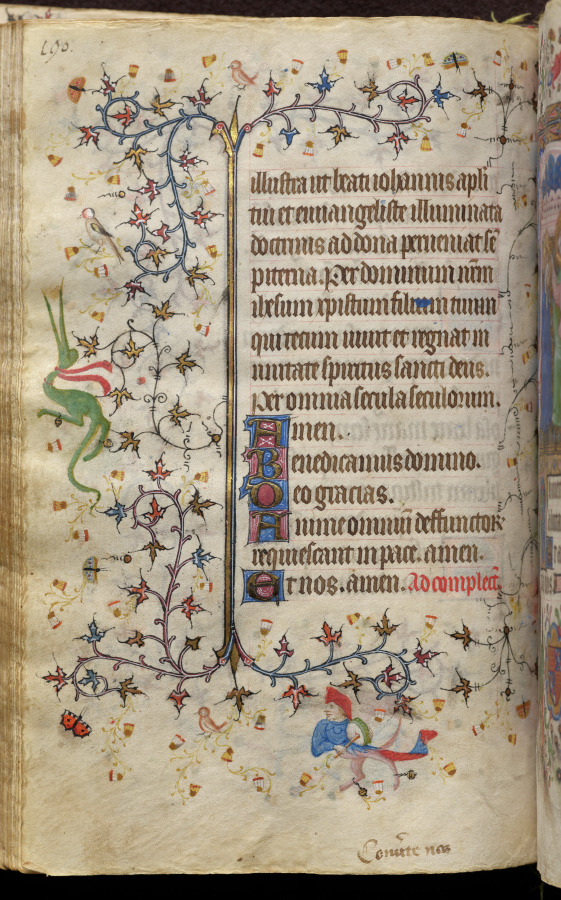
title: Hours of Charles the Noble, King of Navarre (1361-1425): fol. 95v, Text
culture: France, Paris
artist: Master of the Brussels Initials and Associates (French)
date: c. 1405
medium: ink, tempera, and gold on vellum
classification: Bound Volume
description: This precious volume was obviously highly prized by its owner, the French-born King of Navarre, who had his coat of arms painted on no less than twenty folios. Rather than directly commissioning this manuscript from a specific workshop, it seems that Charles the Noble acquired his book of hours -- perhaps ready-made for the luxury market -- while on a trip to Paris in 1404-05. A collaborative effort, six painting styles are evidenced within the pages of this codex, those of two Italians, two Frenchmen, and two Netherlanders. The painter who was responsible for the planning and decoration of the book, and who produced seventeen of the large miniatures, was a Bolognese artist known as the Master of the Brussels Initials. His principal assistant, responsible for most of the borders, was a Florentine who signed his name "Zecho" da Firenze on folio 208 verso.